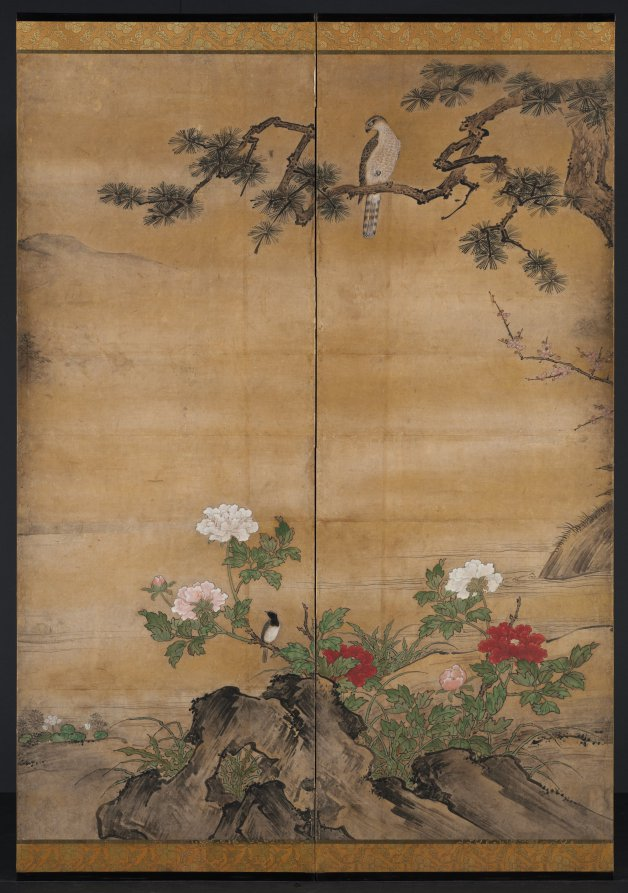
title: Birds and Flowers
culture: Japan, Momoyama period (1573–1615)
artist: attributed to Kano Shōei (Japanese, 1519–1592)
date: late 1500s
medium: One of a pair of six-panel folding screens; ink, color, and gold on paper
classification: Painting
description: The landscape depicted in this pair of screens follows a seasonal progression from right to left, starting with the blossoming plum of early spring and ending with late autumn peonies. A variety of smaller birds are positioned throughout the scene, and a trio of swimming ducks is bracketed by early summer irises and early autumn bellflowers at the center. While some raptors (birds of prey) terrorize a pheasant and an egret (a waterfowl) to the right, a peacock and peahen converse to the left. Hawks are associated with military prowess, while the peafowl suggest cultural prestige.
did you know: Military class patrons frequently requested scenes depicting predation, such as hunting scenes that were inserted as additional subject matter in otherwise tranquil vistas celebrating flora and fauna.